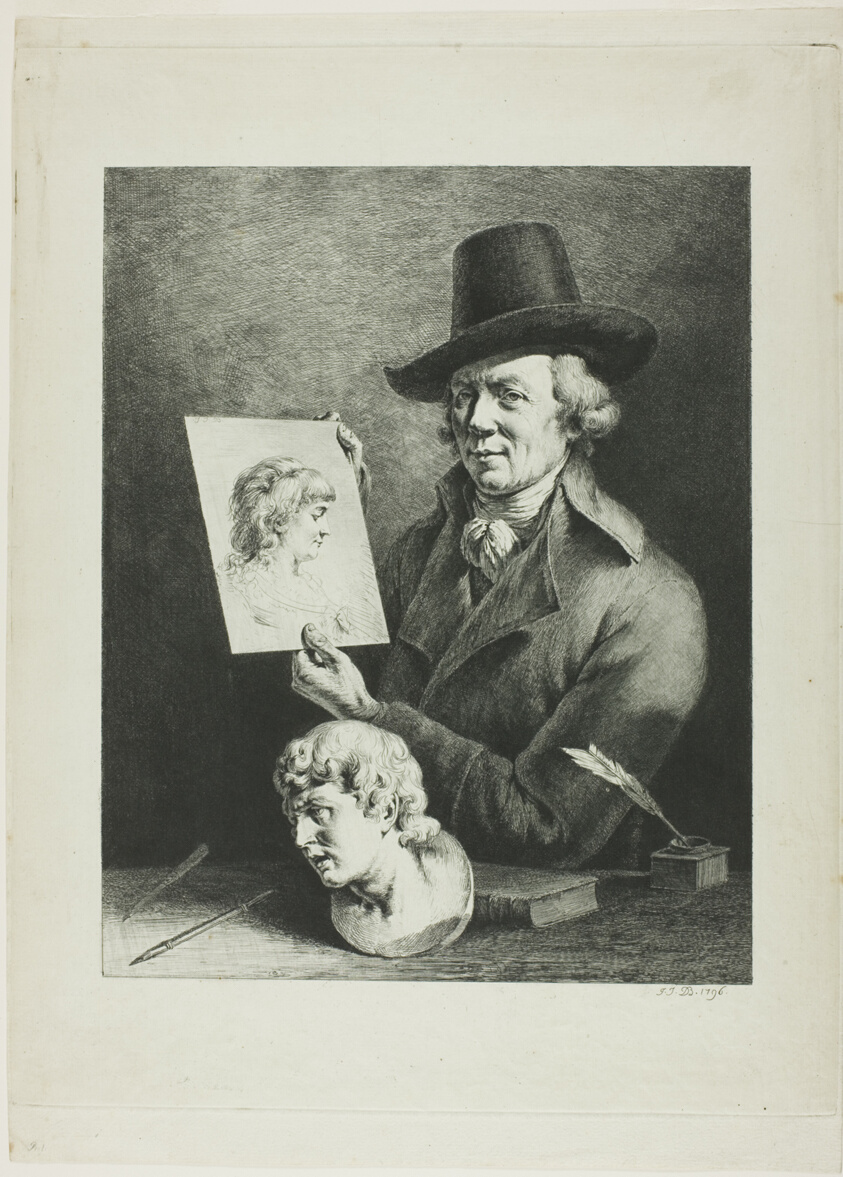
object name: Print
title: Self-Portrait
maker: Jean-Jacques de Boissieu; French, 1736-1810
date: 1796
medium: Etching and drypoint in black on ivory laid paper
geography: France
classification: etching; print; prints and drawing